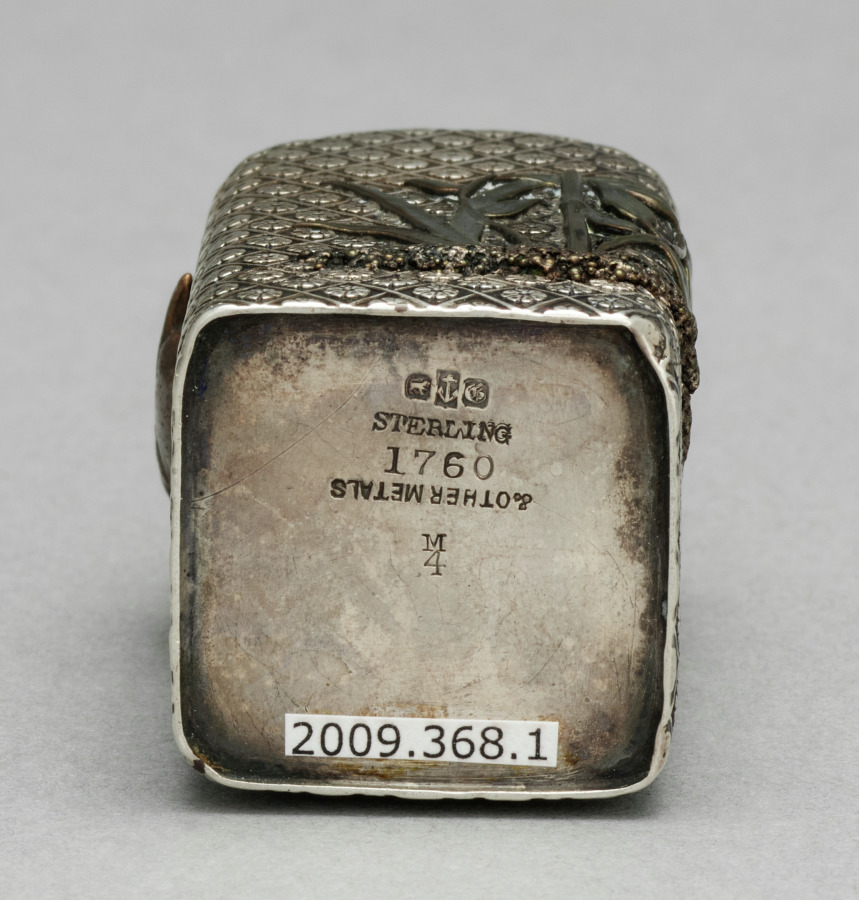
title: Salt Shaker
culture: America, Rhode Island, Providence, 19th century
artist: Gorham Manufacturing Company (America, est. 1831)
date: c.1875–1885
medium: silver and mixed metals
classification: Silver